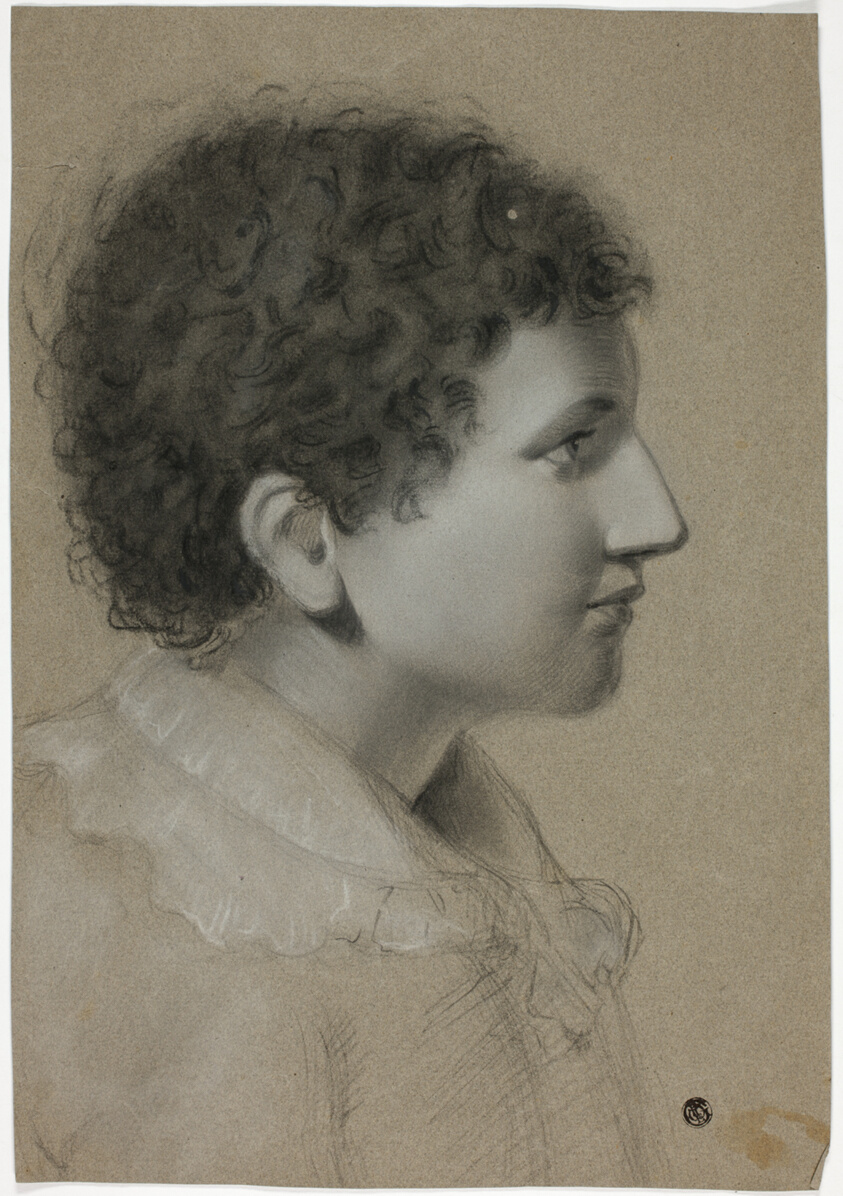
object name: Drawing and Watercolor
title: Profile of Youth with Curly Hair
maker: Elizabeth Murray (English, c. 1815-1882)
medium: Black and white chalk on brown wove paper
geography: England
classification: chalk; drawings (visual works); prints and drawing